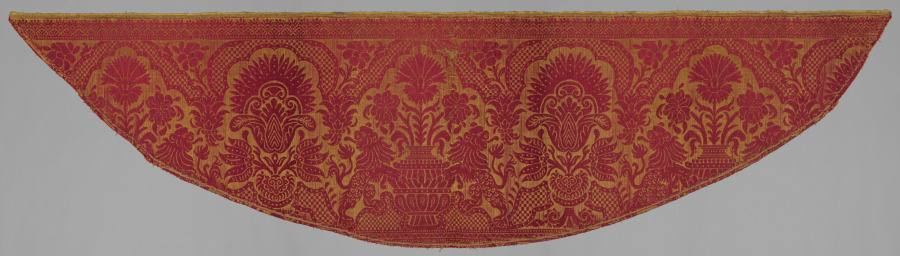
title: Silk and Hemp Fragment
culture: Spain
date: 1500s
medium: plain compound satin: silk and hemp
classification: Textile